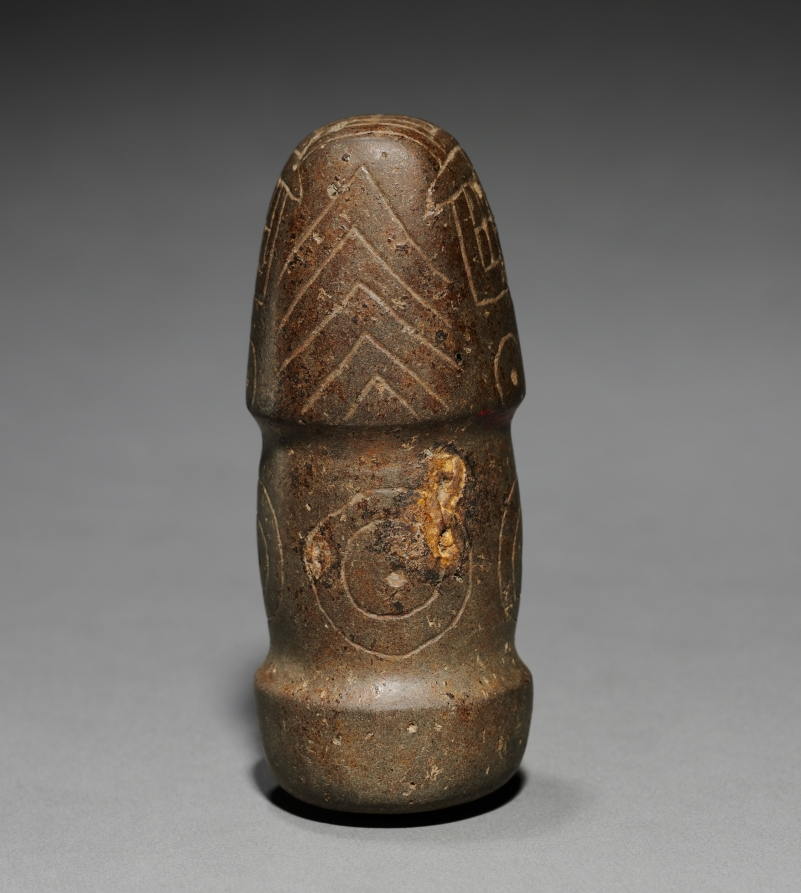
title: Pestle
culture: Peru, North Highlands, Pacopampa(?), Chavín style (900-200 BCE)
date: 700–1 BCE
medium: stone, pigment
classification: Stone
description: Size suggests that this Chavín-style pestle was not used to grind bulky staples like corn, but instead pigments or plant hallucinogens used in religious rites to achieve spiritual insight and communion with cosmic forces. This may come from Pacopampa, a site in the northern highlands where elites adopted Chavín deities and worshiped them alongside local deities. These small sculptures illustrate the appeal and the spread of Chavín religion.